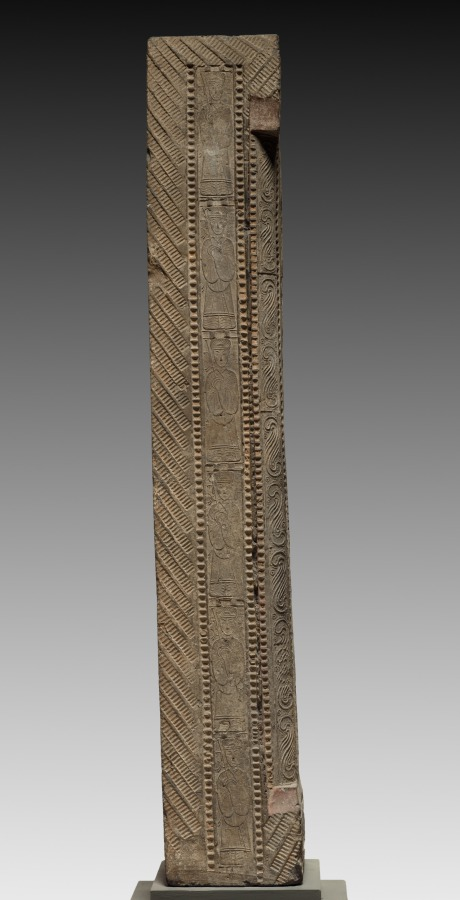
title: Hollow Tile: Column from Tomb-Chamber Doorway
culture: China, Han dynasty (202 BCE–220 CE)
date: 100–200 CE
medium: earthenware, die-stamped relief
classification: Ceramic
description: Striding tigers (top), racing horsemen (right column), and reverent officials (left column) are stamped into the surface of this underground portal to a tomb. The doorway preserves in stone the post-and-lintel structure, a basic element of Chinese wooden architecture. By the first century AD, a revolution in Chinese tomb construction and furnishing had taken place. Tombs lined with decorated bricks and tiles replace the earlier tombs constructed with only rammed earth-walls. Ceramic surrogates or models of stoves, houses, servants, and pets filled these more durable chambers, symbolically extending the creature comforts of this world into the world after death.